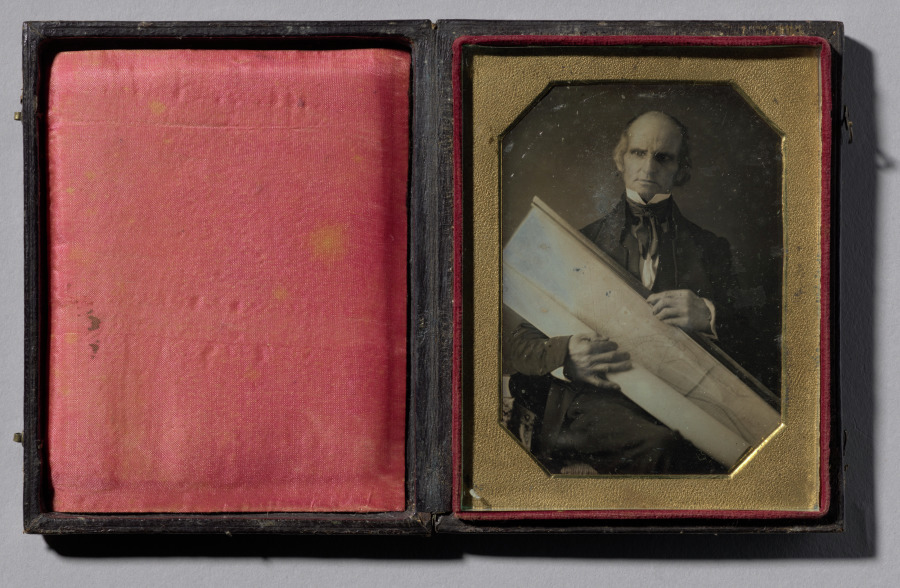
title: The Map Maker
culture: America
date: c. 1843–45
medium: daguerreotype, quarter plate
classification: Photograph